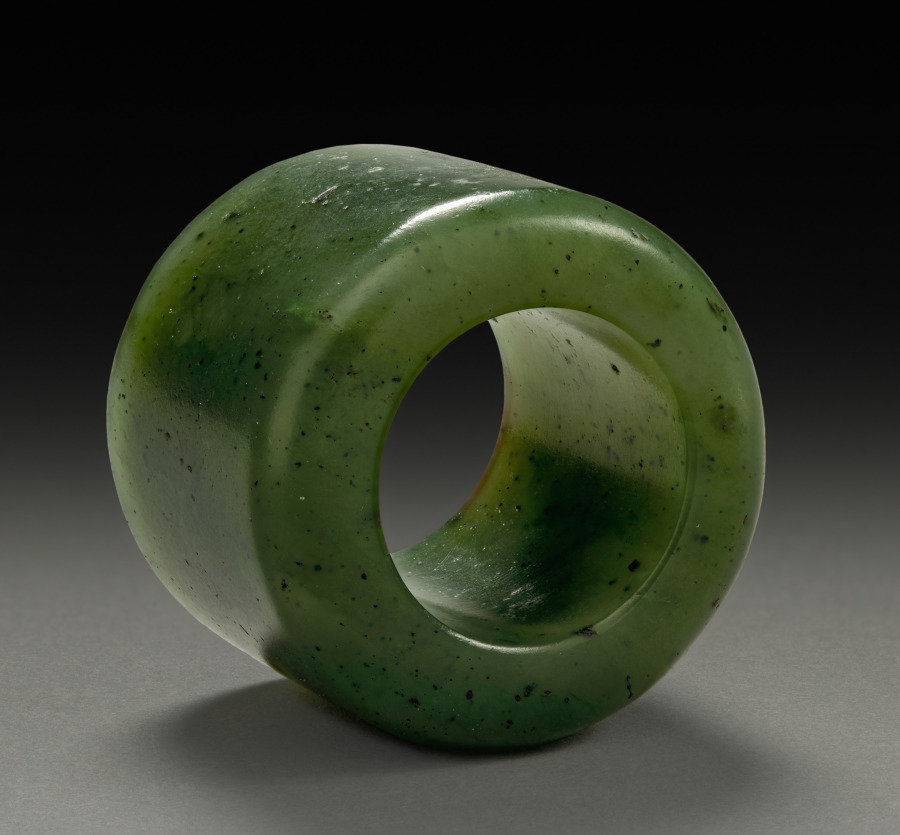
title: Thumb Ring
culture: China, Qing dynasty (1644–1911), Qianlong reign (1736–95)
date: 1736–95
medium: spinach green jade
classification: Jade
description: Jade rings were worn by men on the thumb of the right hand to assist with holding and pulling the string of the archer’s bow. However, thumb rings were also fashionable accessories for civil officials in the late Qing dynasty.